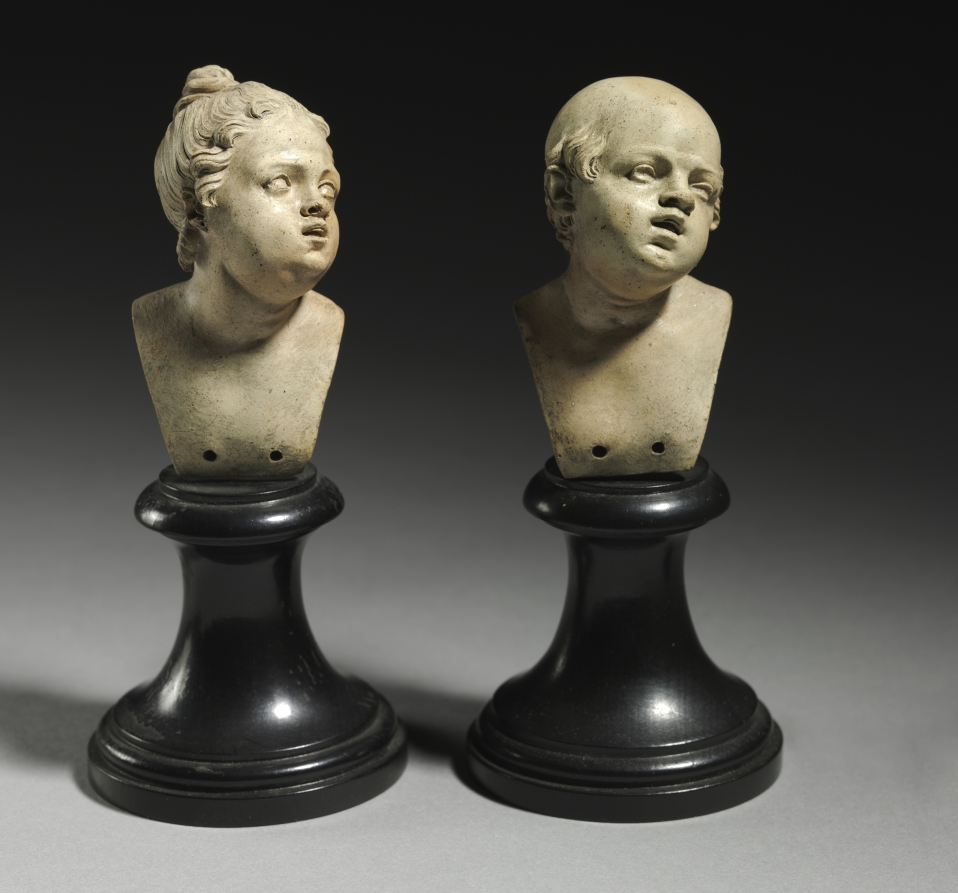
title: Bust Pair: Head of a Man and Head of a Woman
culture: Italy, Naples(?), early 19th Century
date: c. 1800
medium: terracotta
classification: Sculpture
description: Each of these miniscule terracotta busts has allegedly been formed by hand, though the precision of the detailed features implies that they have been cast from a mold. Details such as the meticulously executed facial features and the thin, exact rows of hair on each figure suggest a manufactured method of creation. Furthermore, these figures lack any trace of fingerprints that handmade figures of this time typically bear. Small holes at the base of each bust suggest that the heads were once attached to bodies that may have been used as crèche figurines. The busts were created in Naples where large numbers of nativity scenes were produced around the turn of the nineteenth century. The similarity in size to archetypal terracotta crèche figurines as well as the vast production of nativities in Naples at this time suggest that these busts were created for a nativity scene.